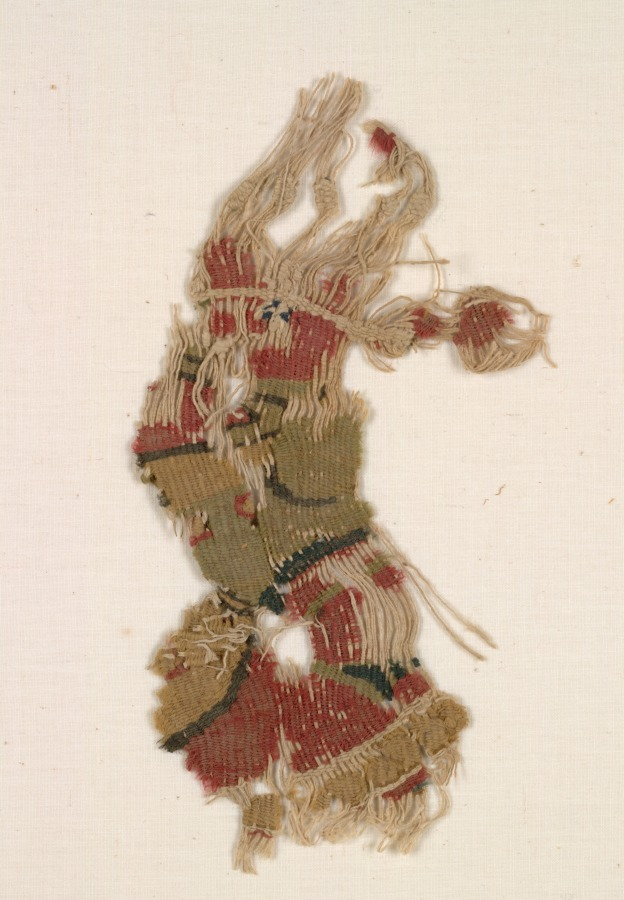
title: Two Fragments with Indistinguishable Design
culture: Egypt ?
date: before 1968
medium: tapestry; linen and wool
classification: Textile